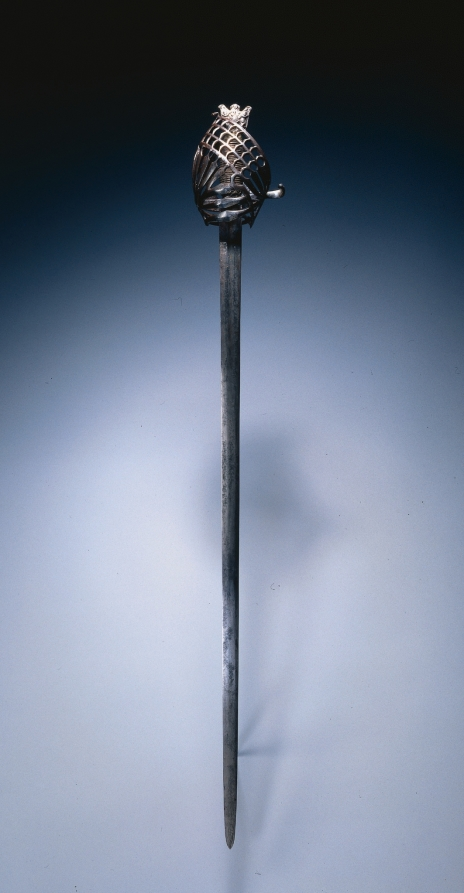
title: Schiavona Broadsword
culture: Italy, Venice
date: early 1700s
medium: steel and silver wire grip. silver pommel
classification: Arms and Armor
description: The schiavona-type broadsword features a complex barred guard that slopes forward. Its name derives from the Italian word for "Slavonic" and refers to the Slavonian corps who served as bodyguards to the Doge of Venice until the end of the Venetian Republic in 1797. Such swords were popular mainly with the Venetians.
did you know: A broadsword is a sword with a straight, wide, two-edged blade and was used by European heavy cavalry through the 1800s.